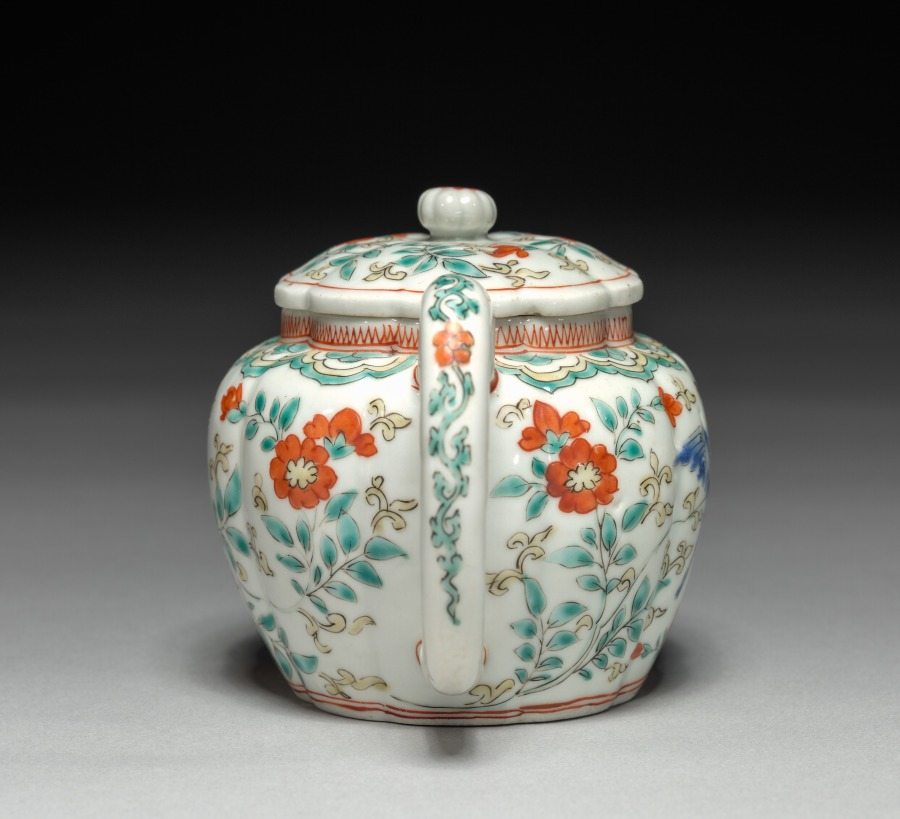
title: Teapot with Birds and Flowers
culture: Japan, Edo period (1615–1868)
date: 1700s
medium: Porcelain with overglaze color enamel (Arita ware)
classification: Ceramic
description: This small vessel was likely made as a teapot for the European export market. The different colored overglaze enamels, orange, blue, green, and yellow, combine with a wiry black outline to form the design of a singing bird on a flowering bough repeated on each side of the pot.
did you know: The wood storage box for this pot refers to it as a suichū, which means water ewer.